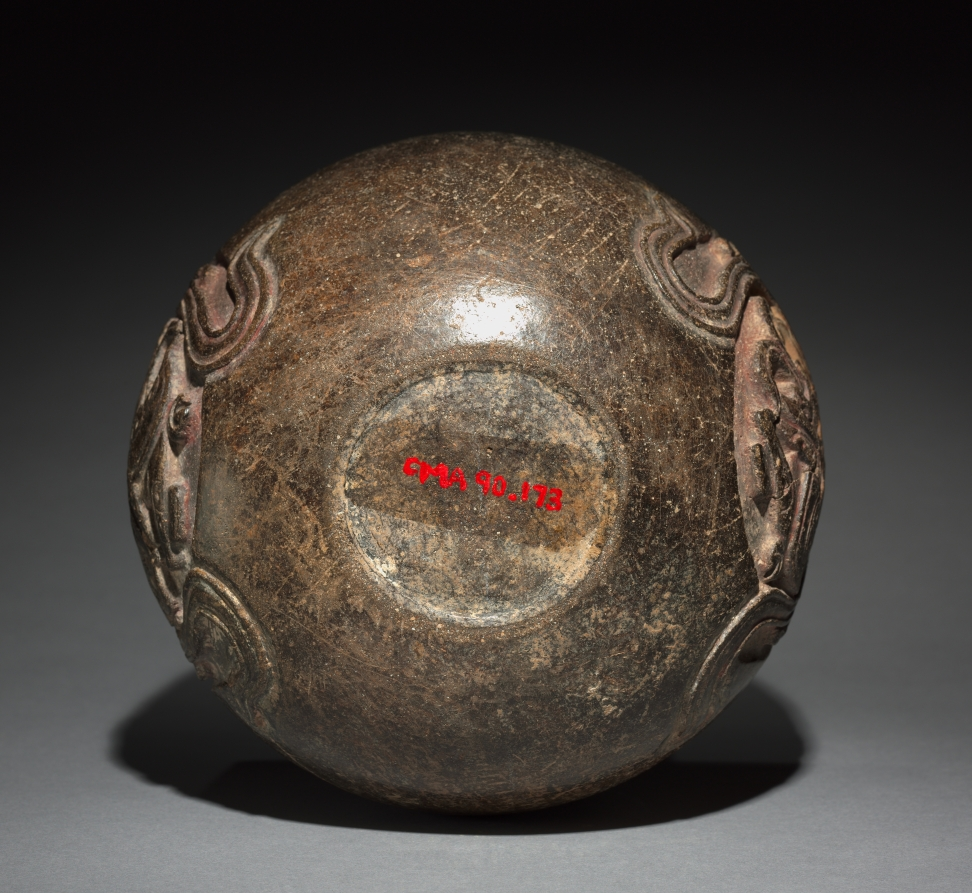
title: Carved Vessel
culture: Mexico, Campeche, Maya, Chocholá Style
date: c. 600–1000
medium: earthenware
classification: Ceramic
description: A firefly is carved on both sides of this Maya vessel, which is from the Yucatán Peninsula. Among the most common of insects to appear in Maya art, the firefly seems to be associated with things that twinkle in the dark—stars and cigars, the latter a symbol that identifies creatures of the night.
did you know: The text on the rim mentions a young man, suggesting this vessel was involved in a rite-of-passage ceremony.